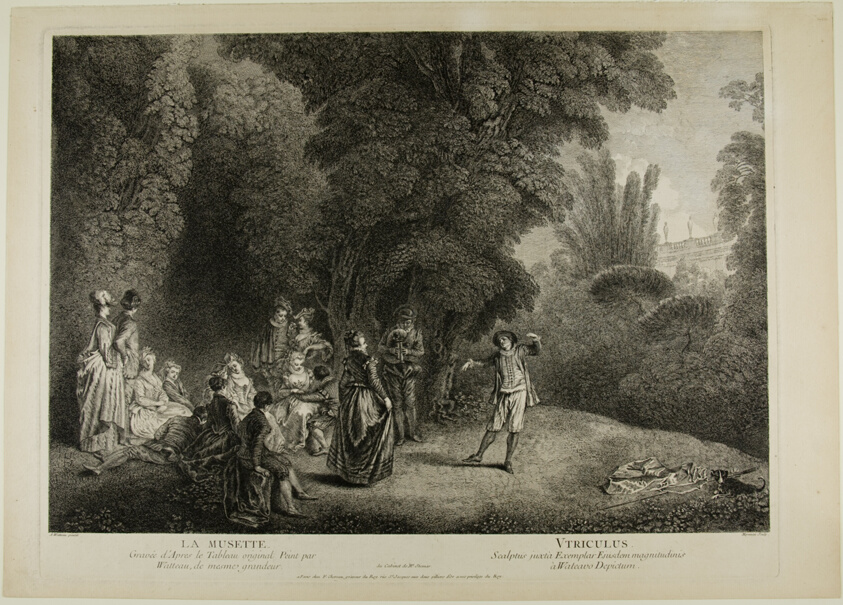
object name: Print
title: The Country Bagpipe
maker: Jean Moyreau (French, 1690-1762); after Jean Antoine Watteau (French, 1684-1721)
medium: Engraving and etching in black on paper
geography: France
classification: engraving; print; prints and drawing